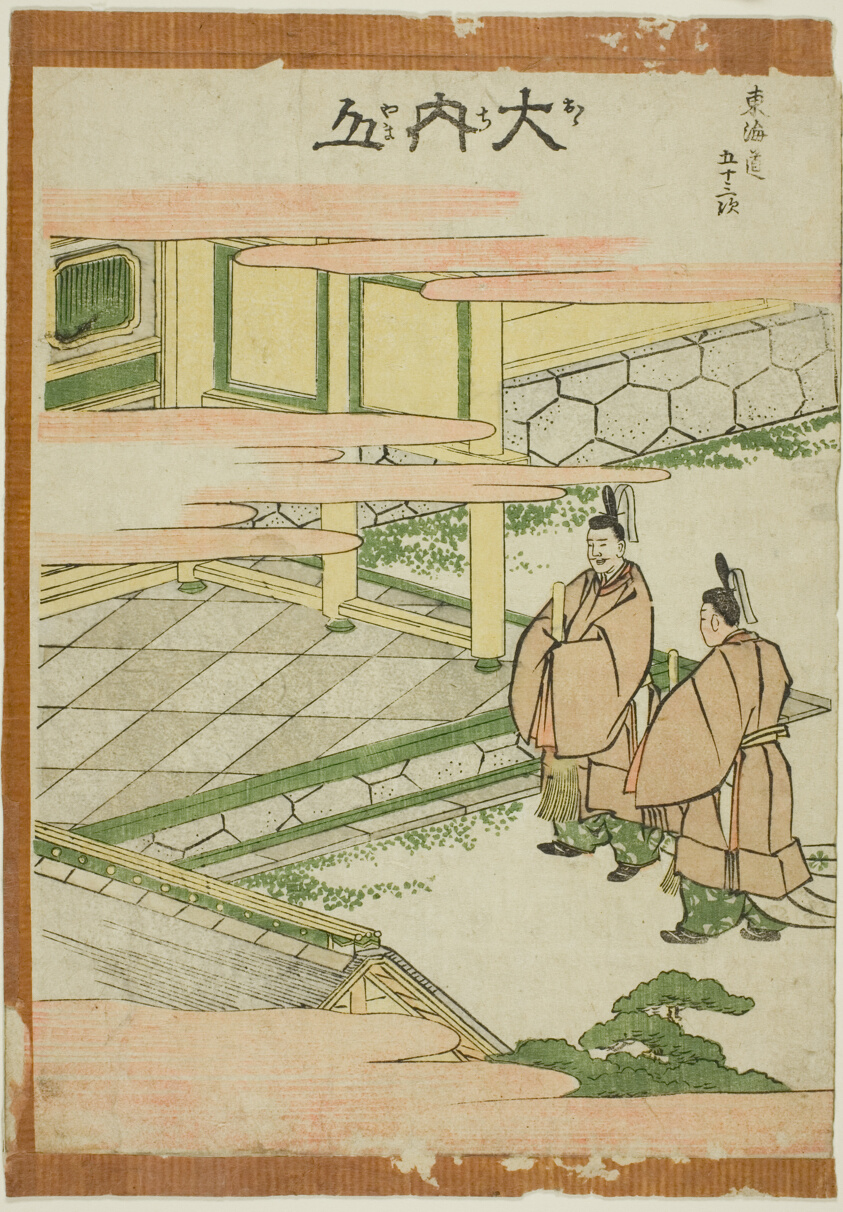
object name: Print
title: Ouchiyama, from the series "Fifty-three Stations of the Tokaido (Tokaido gojusan tsugi)"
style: Japanese (culture or style)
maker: Katsushika Hokusai 葛飾 北斎; Japanese, 1760-1849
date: c. 1806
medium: Color woodblock print; chuban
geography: Japan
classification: woodblock print; print; asian art